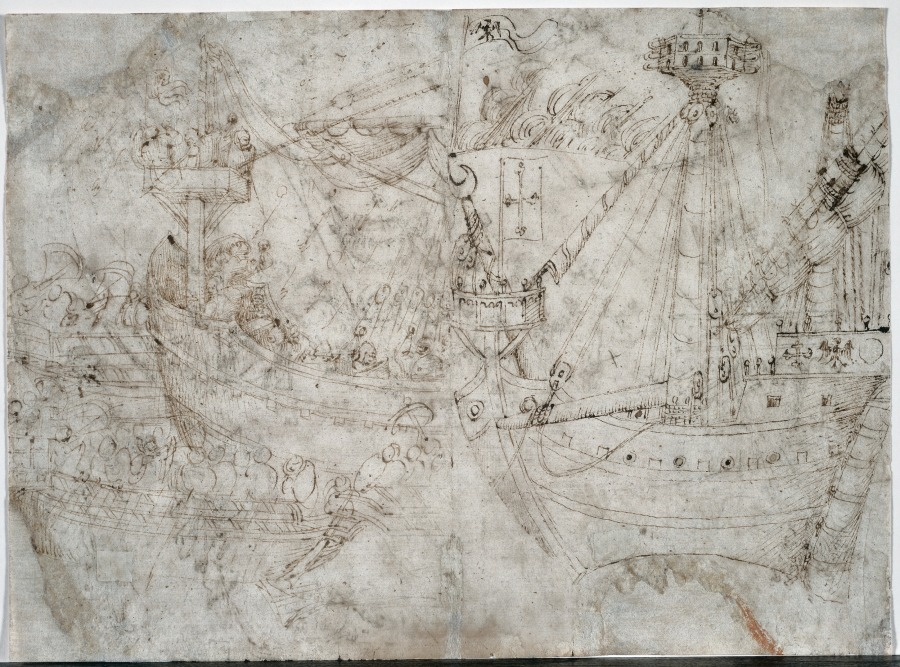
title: Navicella (recto); Two Drawings of Ships (verso)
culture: Italy, Arezzo, 15th century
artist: Parri Spinelli (Italian, 1387–c. 1453)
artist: after Giotto (Italian, 1266–1337)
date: c. 1410s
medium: pen and brown ink (iron gall)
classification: Drawing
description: Once attributed to the Italian painter Giotto (about 1267-1337), this drawing is the oldest sheet in the Cleveland museum's collection. We now know it to be a copy by Parri Spinelli after a mosaic Giotto designed for the portico of the church of Old St. Peter's in Rome.